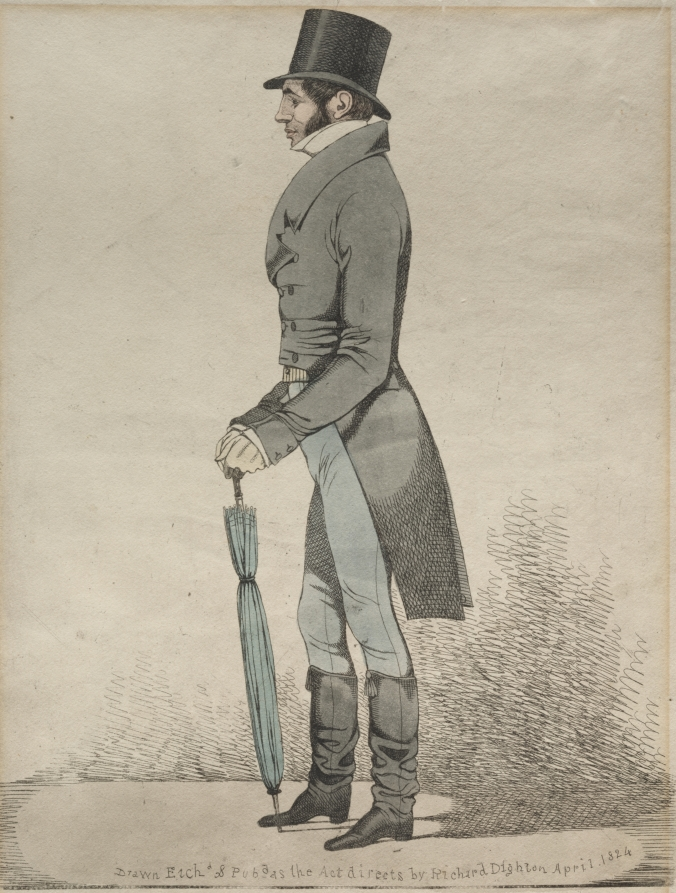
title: A View of the Royal Exchange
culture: England, 19th century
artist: Richard Dighton (British, 1795–1880)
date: 1824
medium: etching, hand colored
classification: Print